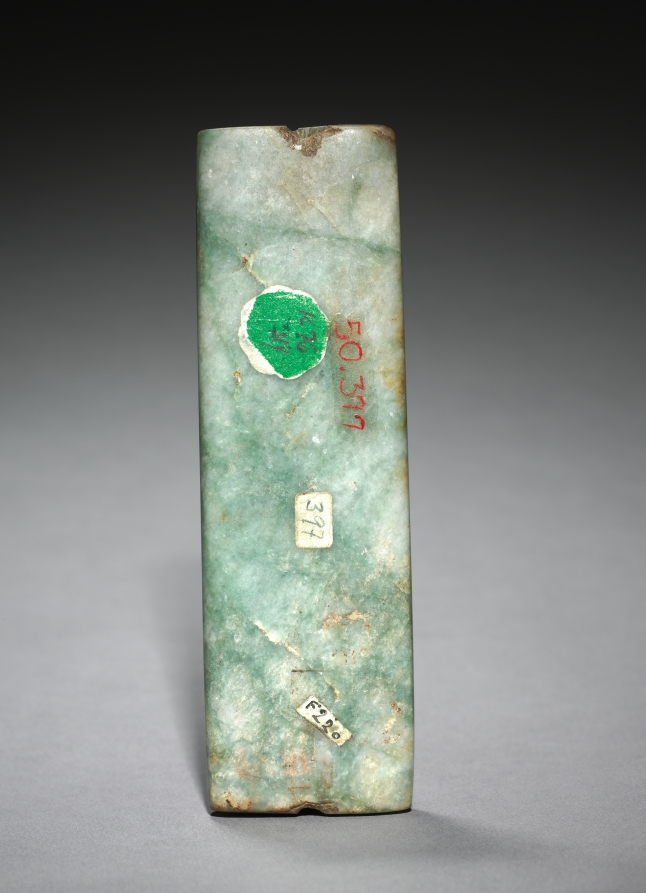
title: Bar Bead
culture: Mexico or Central America, Maya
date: 250–550 CE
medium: jadeite-albitite, modern black pigment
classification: Jade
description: Greenstone ornaments were part of Maya nobles’ regalia. The hieroglyphs of the bead, which hung horizontally, refer to two Maya rulers.